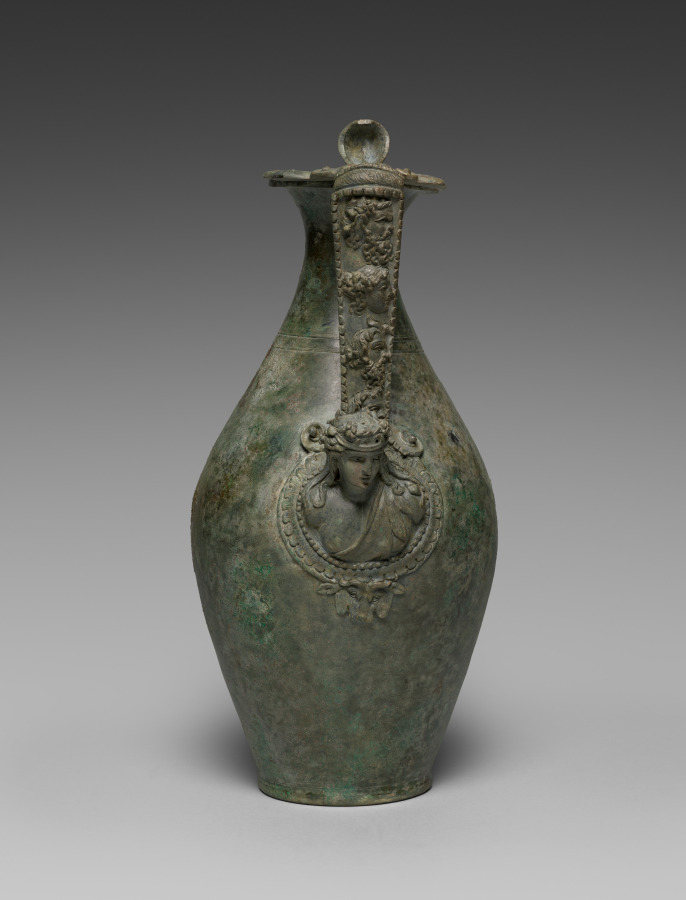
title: Olpe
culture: Italy, Roman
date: 1–100 CE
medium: cast bronze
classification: Metalwork